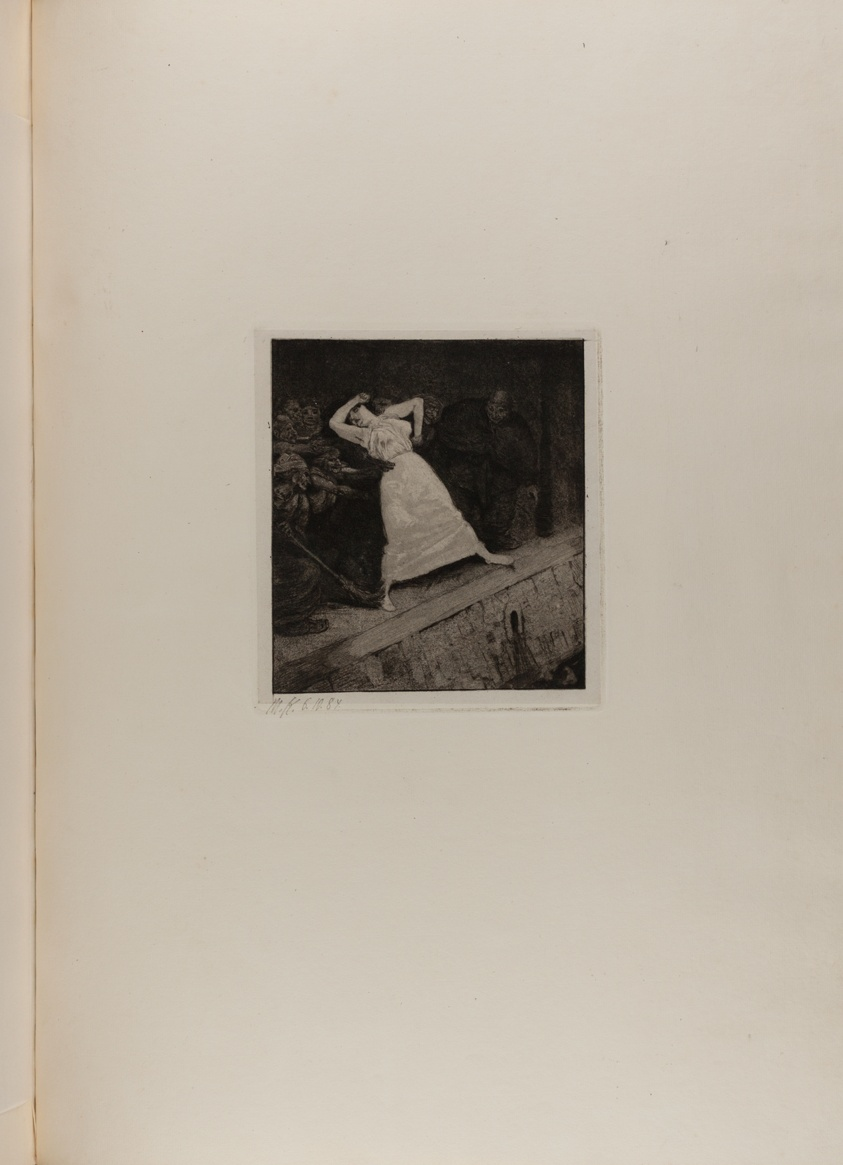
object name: Print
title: Into the Gutter!, plate ten from A Life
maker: Max Klinger (German, 1857-1920); printed by Otto Felsing (German, 19th century)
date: 1884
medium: Etching and aquatint, with stipple on ivory China paper, laid down on cream laid paper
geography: Germany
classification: etching; print; prints and drawing